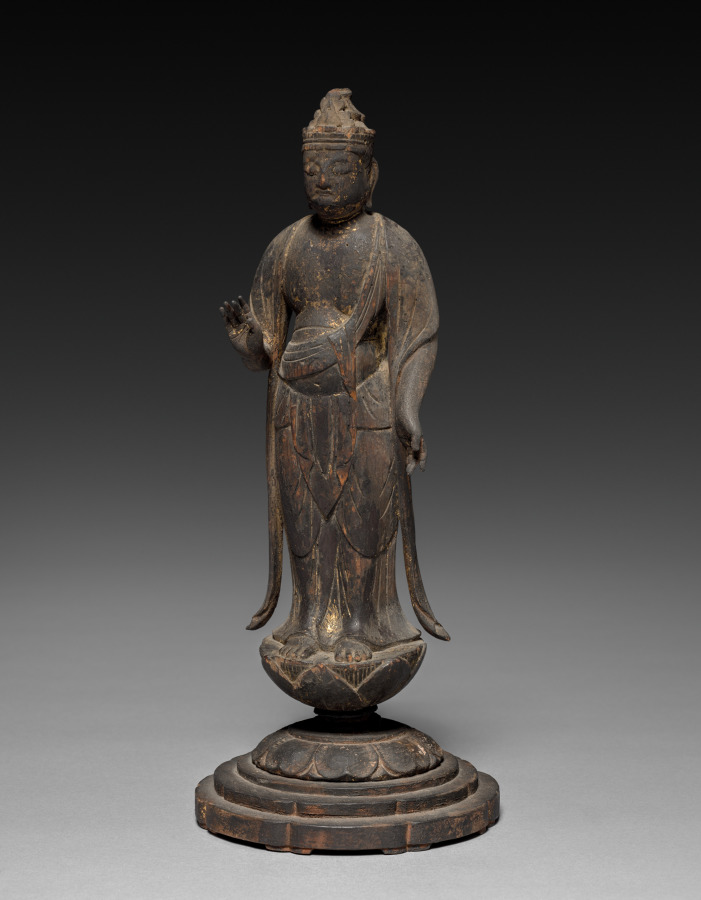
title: Kannon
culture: Japan, Heian period (794–1185) or Edo period (1615–1868)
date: 1000s or c. 1800–1868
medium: Wood with traces of lacquer and gilding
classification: Sculpture